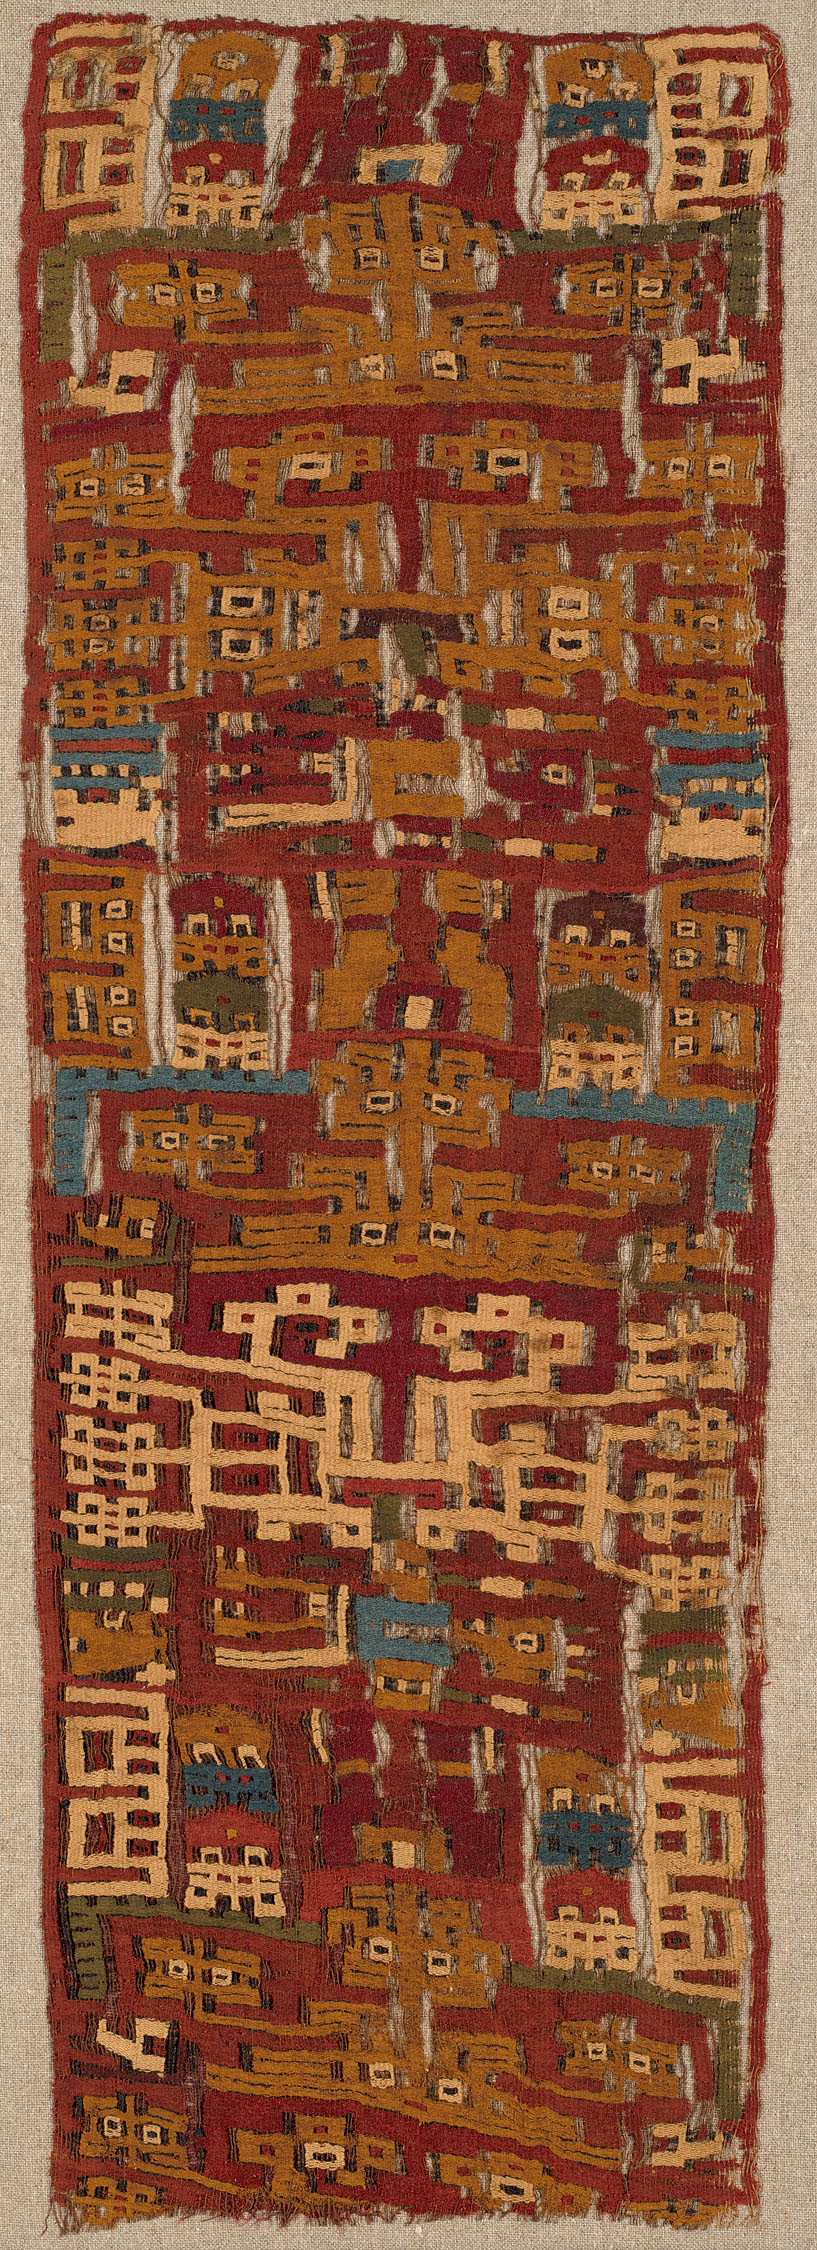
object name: Textile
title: Fragment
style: nazca, early intermediate period, americas, Pre-Columbian, andean, andes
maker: Peru, South Coast, Nazca culture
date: 200 B.C./A.D. 600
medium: Cotton and camelid wool, slit tapestry weave with interlaced outlining wefts; edged with plain weave; parts of selvages present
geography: Peru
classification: textile; weaving